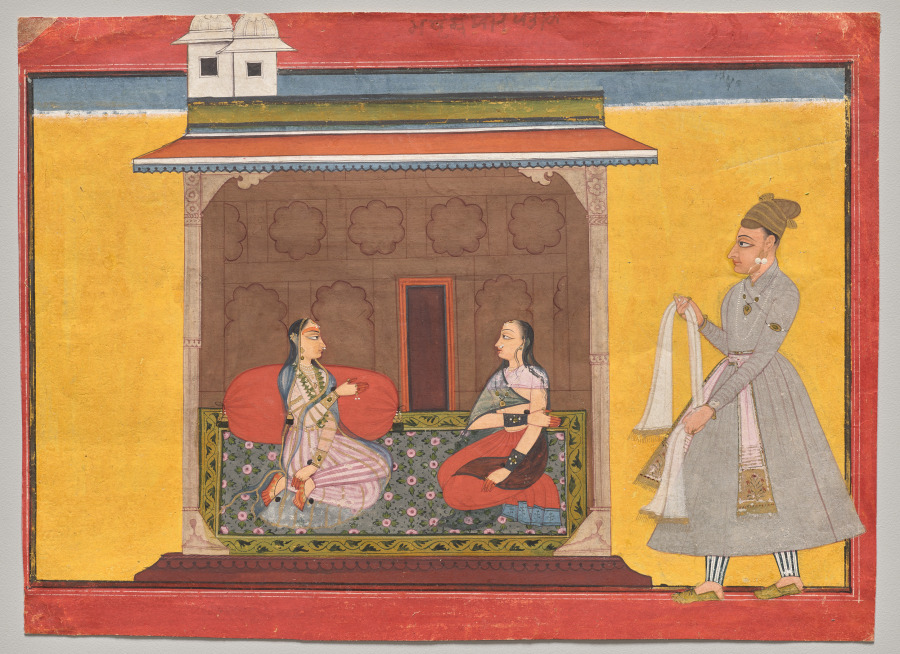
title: The Heroine Who is Faithfully Loved: Madhya Svadhinapatika Nayika, from a Rasamanjari of Bhanudatta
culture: Northern India, Pahari kingdoms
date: c. 1710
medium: Gum tempera, ink, and gold on paper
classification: Painting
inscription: Madhyā Svādhīnapatikā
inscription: Madhyā Svādhīnapatikā jadapi rati mahotsave nakāro jadapi kareṇa ca nīvi dhāraṇāni. 70 tadapi ca patirekhā pārasvādeśaṁ sakhi nahi muṅcati takisācarāmi.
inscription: Aratha. Svadhīnapatikā dā udāharaṇa. Nāīkā sakhiyā kane ākhadī hai je hai sakhi saṁbhoga vikhe nahiṅ nahiṅ kardī hathe karī nāde pakadī chaḍanī haṅ tāṅ bhī e merā khāund mere vakhen nahīṅ chaḍadā huṅ sīkh de jeu keh karāṅ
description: The heroine sits in front of the elongated red cushion, gesturing to her companion in conversation. She is trying to decide if she should agree to submit to her husband or continue to be coy. A verse from a Sanskrit poem by Bhanudatta Misra, who lived during the late 1400s to early 1500s in northeastern India, has been quoted on the back of the painting. The verse has been written both in Sanskrit using the Takri script of the Pahari region and in a local vernacular translation.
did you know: The man at right nervously grasps his scarf as he respectfully approaches his lover and her companion.